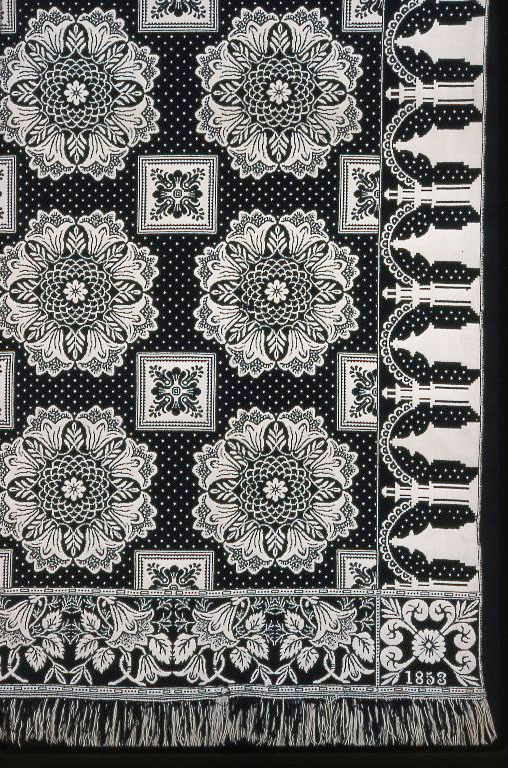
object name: Textile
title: Coverlet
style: 19th century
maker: John Rogers (American, born Irish, active c. 1853); United States, Indiana, Wayne County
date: 1853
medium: Cotton and wool, plain weave double cloth; woven on loom with Jacquard attachment; two loom widths joined; fringed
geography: Indiana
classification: weaving - coverlet; coverlet; weaving; textile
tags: medallions, rectangles, foliage, scalloping, buildings, floral motifs, flowers, squares, coverlet